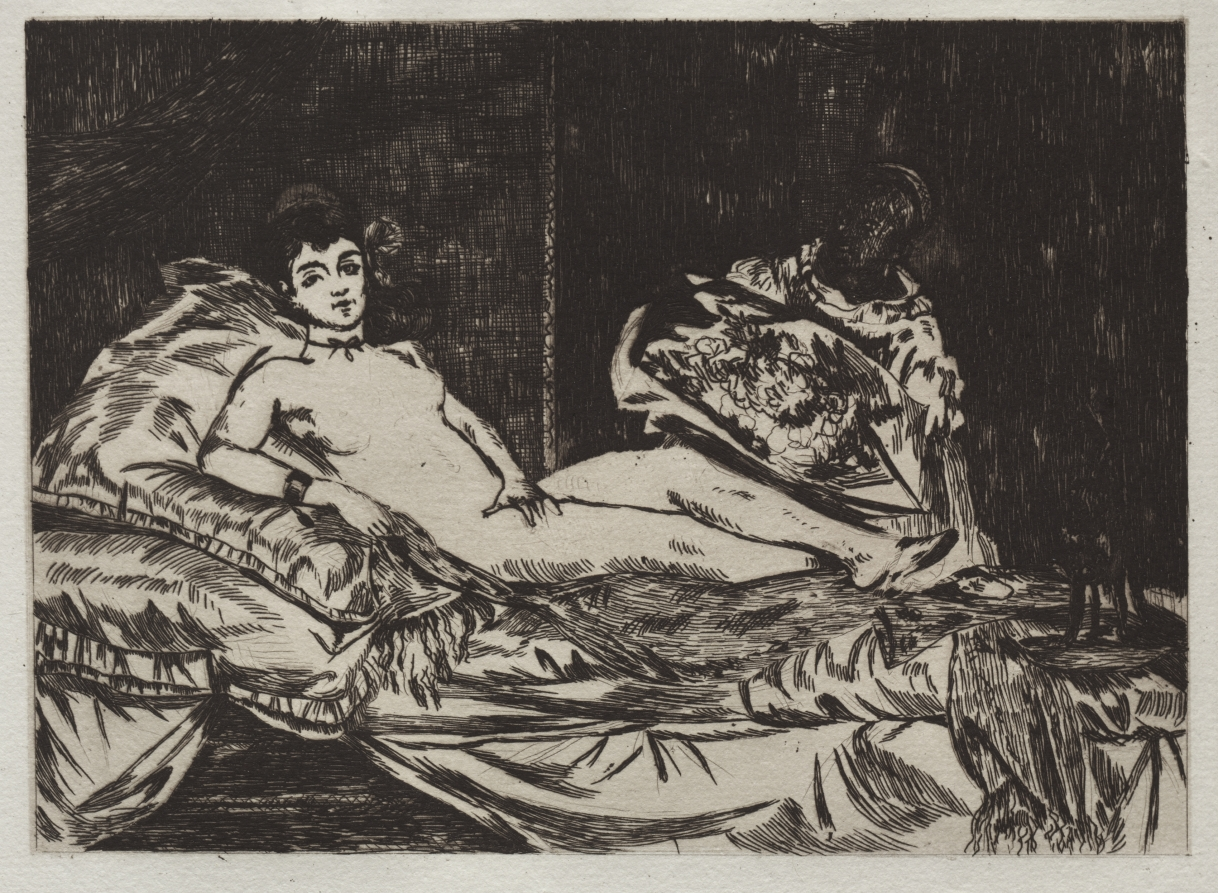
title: Olympia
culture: France, 19th century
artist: Édouard Manet (French, 1832–1883)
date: 1867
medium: etching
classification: Print